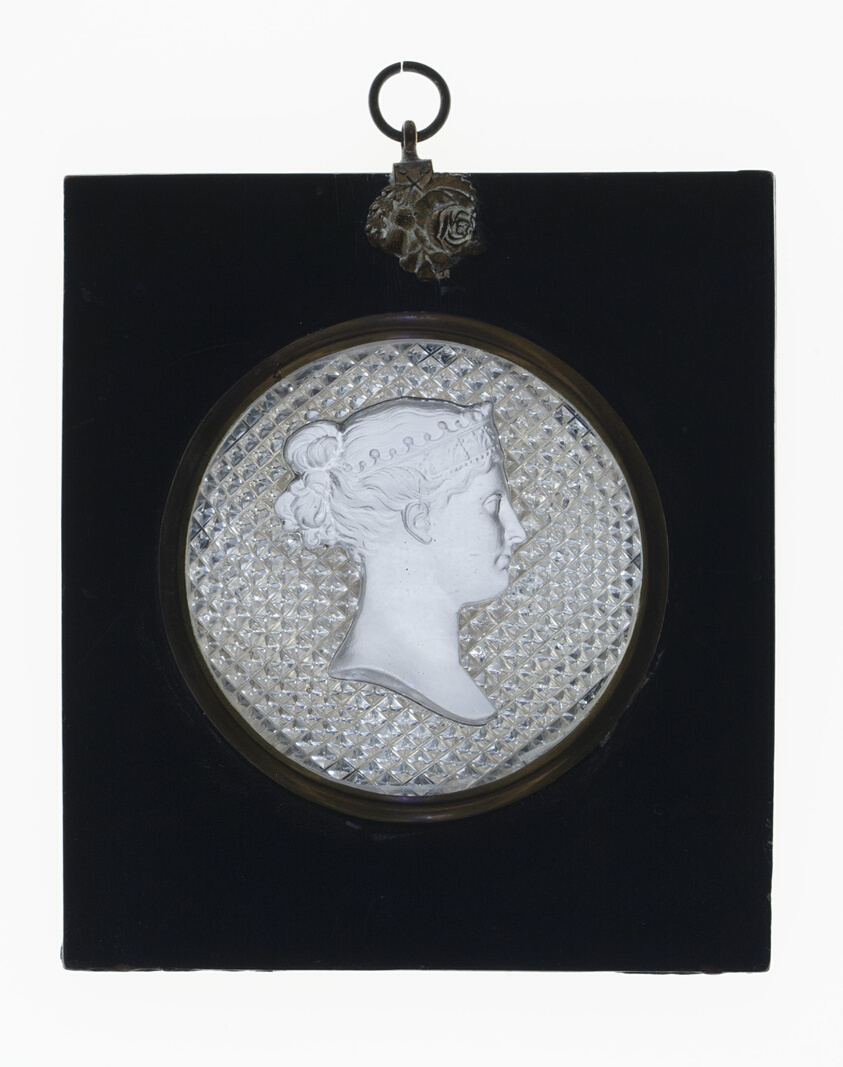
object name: Glass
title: Portrait Plaque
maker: Apsley Pellatt and Company; England, 1790-1875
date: 1820/30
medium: Glass, sulphide, painted wood, bronze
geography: England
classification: sulphide (glass); paperweight; european decorative arts; glass